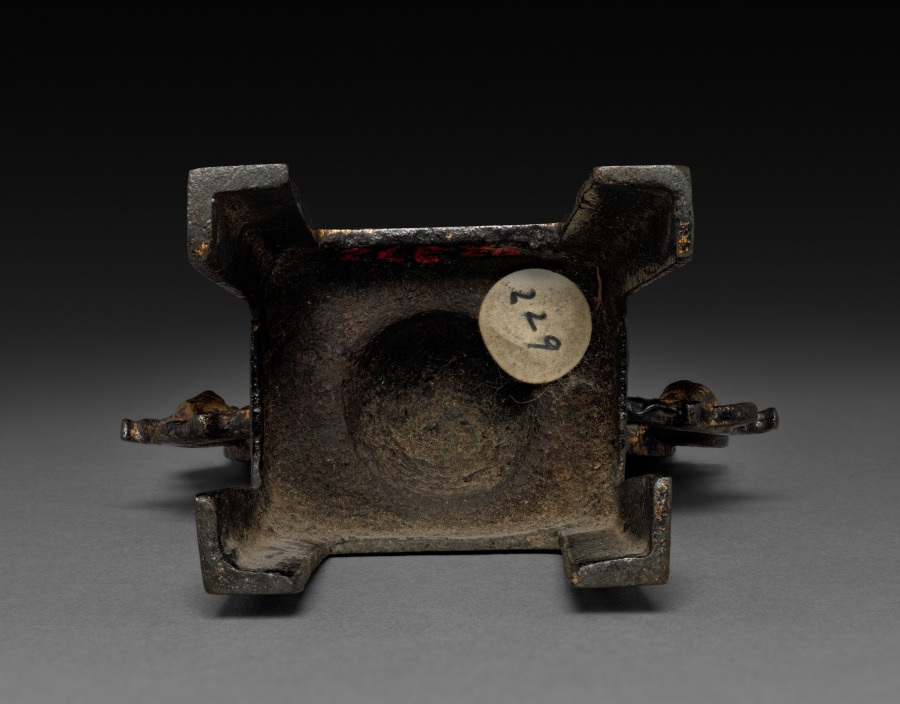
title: Sakyamuni with Two Attendants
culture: China, Sui dynasty (581-618)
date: 600s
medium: gilt bronze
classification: Metalwork